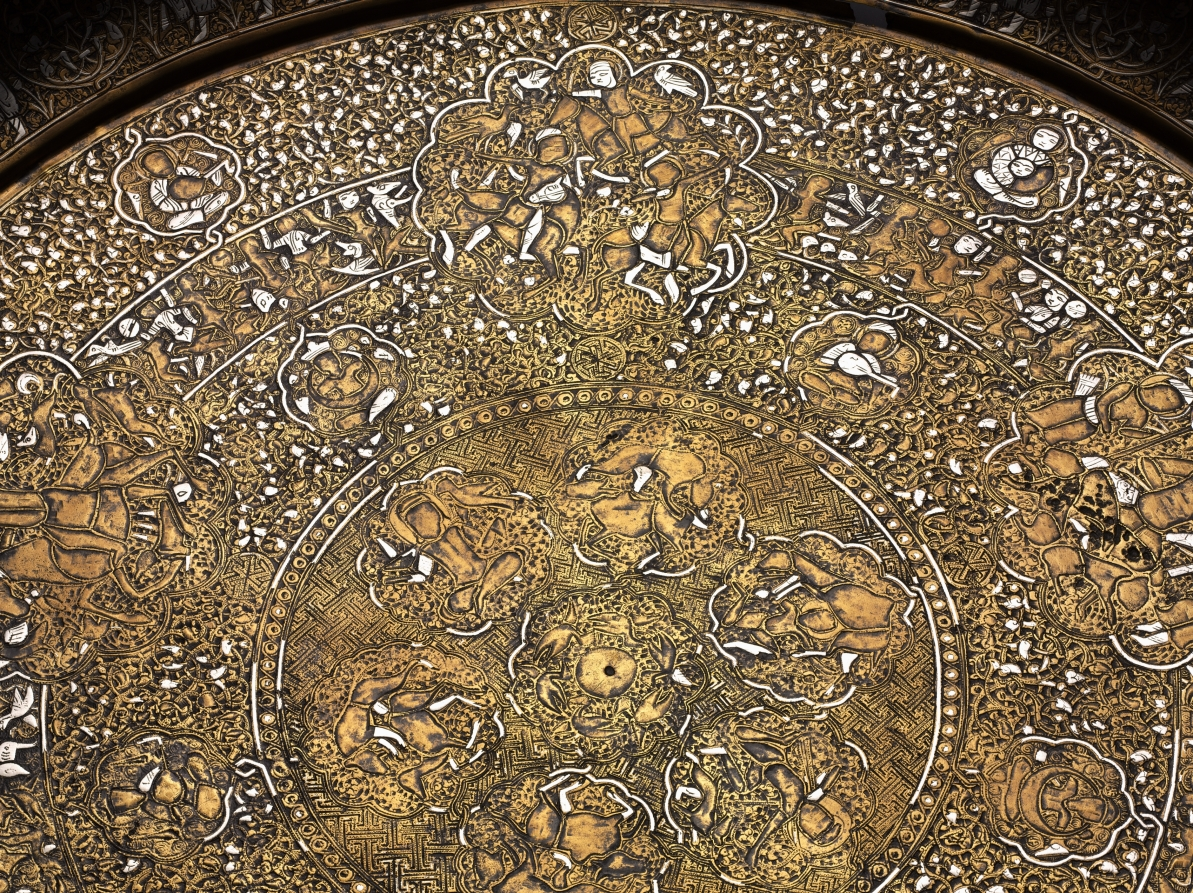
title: Tray Portraying Courtly Pleasures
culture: Syria, Ayyubid period (1171–1260)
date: 1240s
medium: sheet brass inlaid with silver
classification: Metalwork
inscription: The presence of ligatures in the narrow circular bands with interconnected human and animal figures suggests this may be a degenerate form of animated script. It is indecipherable.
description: This tray features images of courtly life interspersed with astronomical symbols. The scenes contained within large multilobed medallions display an enthroned prince with lions at his feet, a banquet, a hunt, dancers, and musicians. Contained within the concentric circles there are also references to solar and lunar motifs, including figures holding sunbursts and lunar crescents. This tray is made of a single sheet of brass and the silver inlay, which is best preserved on the tray’s inner curve, suggests its original brilliance.